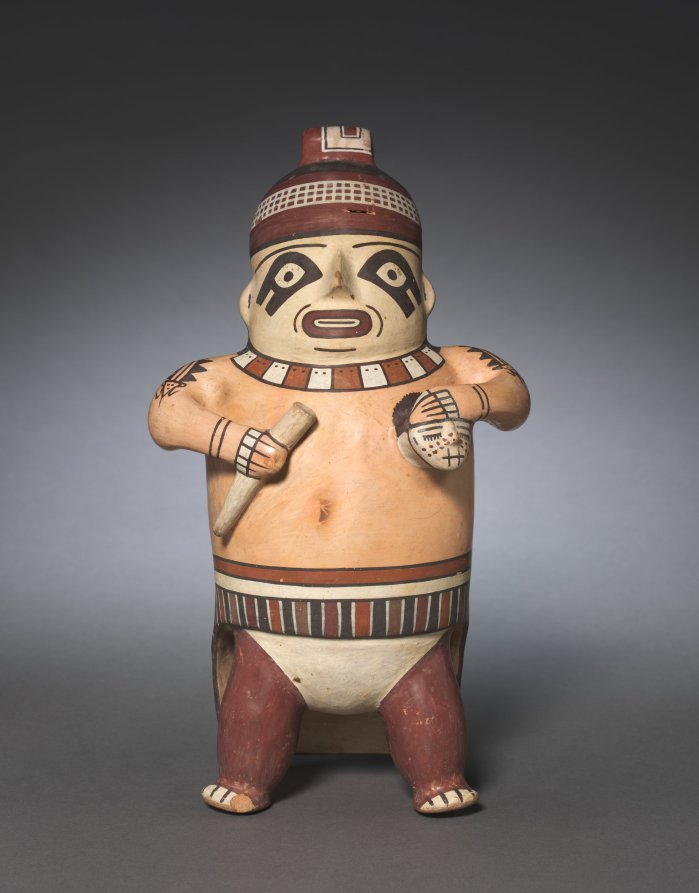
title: Male Effigy Vessel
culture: Peru, South Coast, Nasca, Early Intermediate Period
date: 100–650 CE (thermoluminescence date, 410–1010 CE)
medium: ceramic and slip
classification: Ceramic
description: The style is typically Nasca: modeling is minimal and the surface is decorated with the vibrant, earth-colored slips that are a hallmark of Nasca ceramic art. Male figures are a well-known category of Nasca ceramic production, although the shape of this one, which stands upright on two legs and is additionally supported from behind by a long loincloth, is unusual.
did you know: This figure holds a human head, which the Nasca viewed as a source of great power.